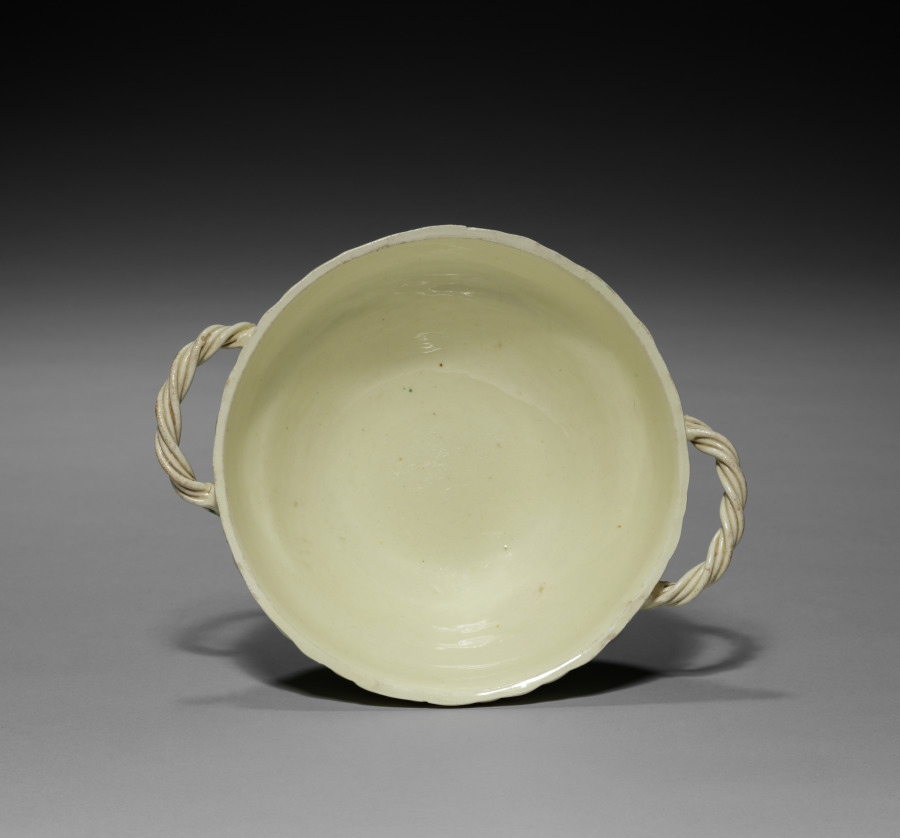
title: Wicker-Work Sauce Tureen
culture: England, 18th-19th century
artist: Wedgwood Factory (British)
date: c. 1780–1840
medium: earthenware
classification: Ceramic